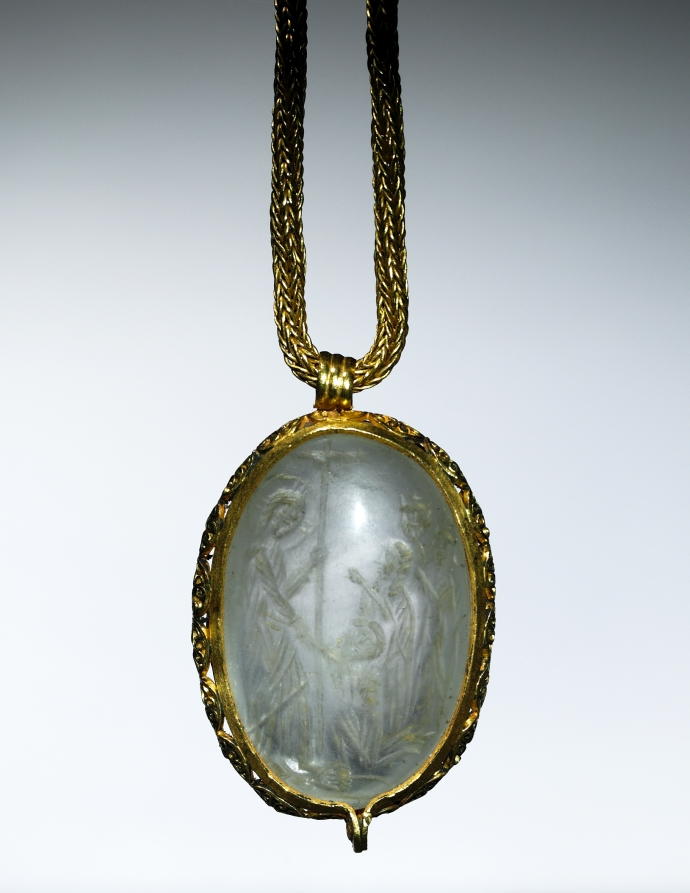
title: Pendant with Reverse Intaglio of the Anastasis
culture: Byzantium, late 6th century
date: late 500s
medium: rock crystal, with gold mount and chain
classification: Jewelry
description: This pendant consists of two dome-shaped pieces of rock crystal, one of which has the design cut into its reverse. The subject is the Anastasis, which shows Christ entering the gates of Hell and releasing Old Testament figures said to have believed in his divinity before his birth. On the left, Christ (with a cross staff) reaches out to Adam, who kneels before him. Eve stands behind, also reaching out her hand. The chain may be of later date.